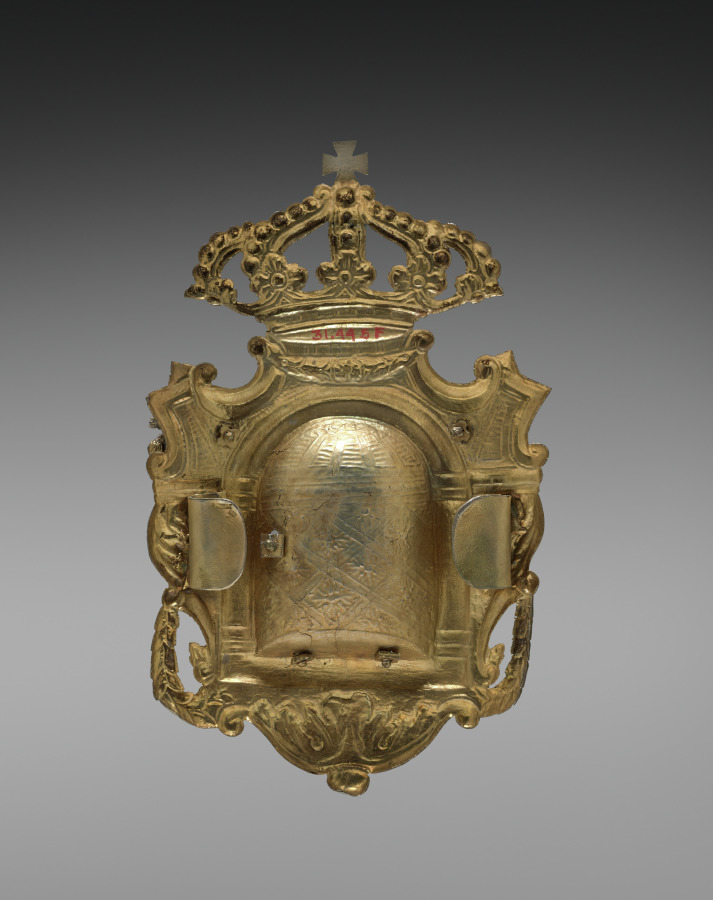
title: Woman's Costume (Metal Belt Buckle)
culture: Italy, Sicily, 19th century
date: 1800s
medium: silver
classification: Metalwork